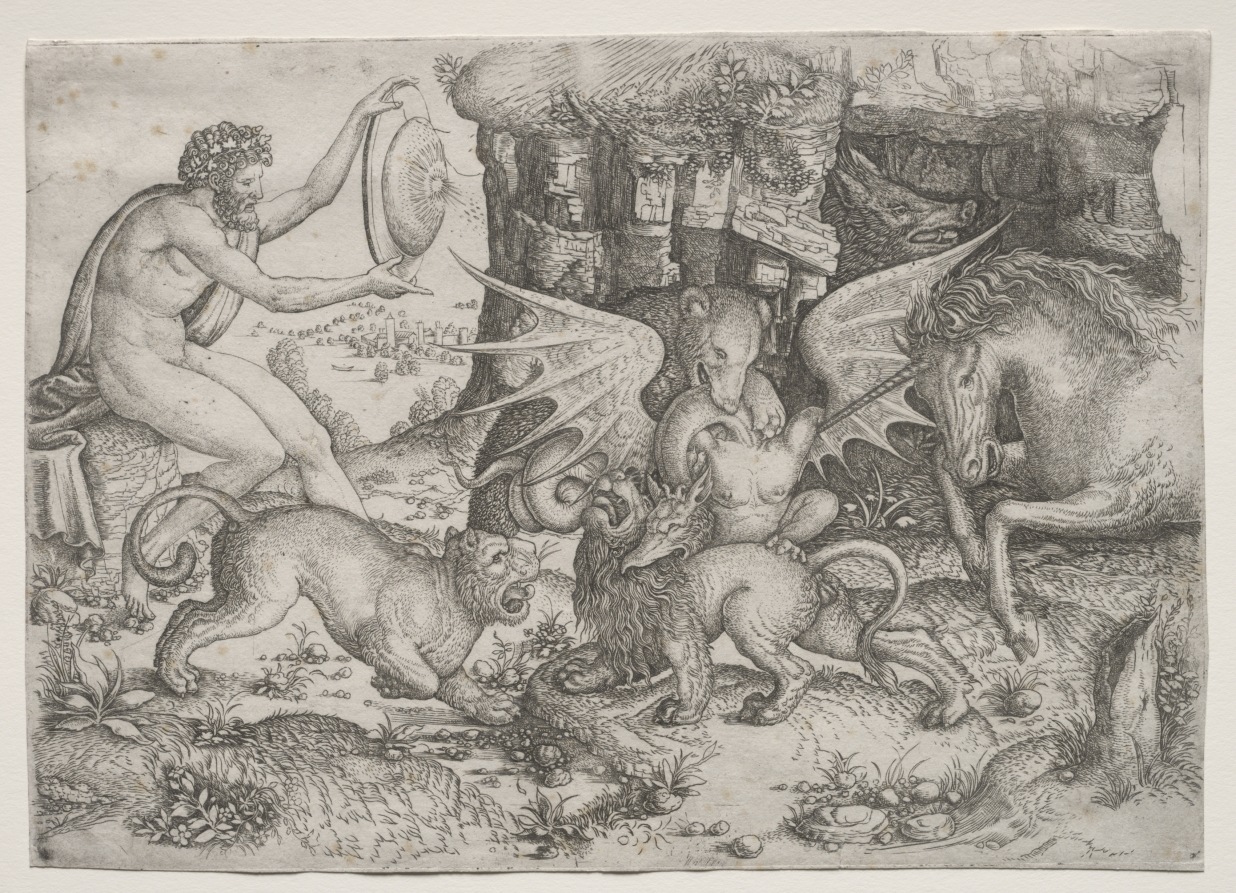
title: Allegorical Theme: Combat of Animals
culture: Italy, 16th century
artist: Master of the Beheading of St. John the Baptist (Italian)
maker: after Leonardo da Vinci (Italian, 1452-1519)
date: c. 1515–20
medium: engraving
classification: Print